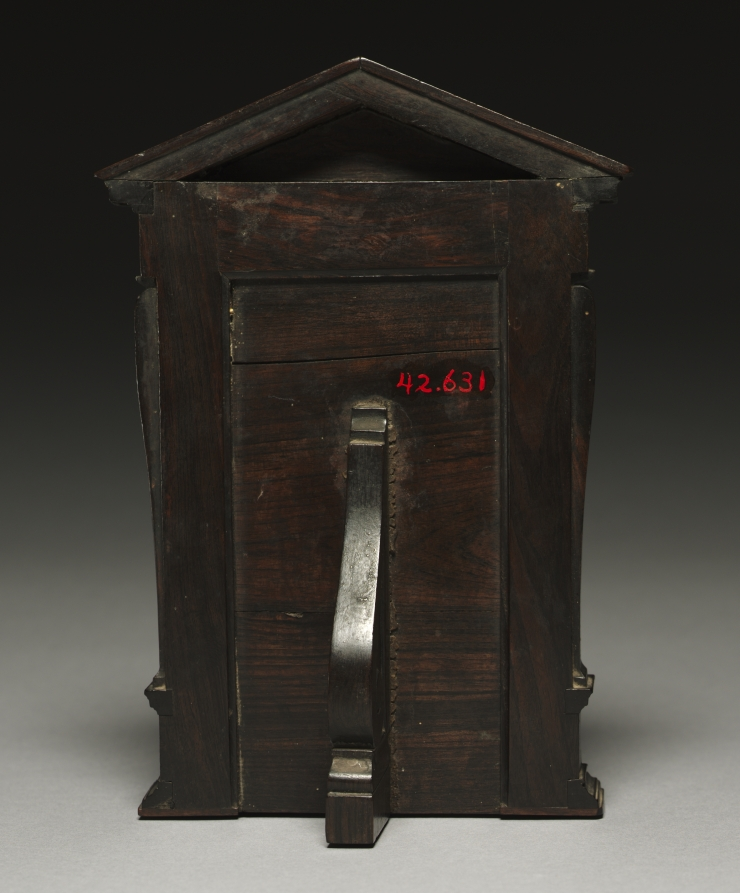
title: Pax with Christ Appearing to the Apostles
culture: Germany, late 16th century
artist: cast after a model by Valerio Belli (Italian, c. 1468–1546)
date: late 1500s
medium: gilt bronze in ebony frame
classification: Sculpture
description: A pax is a tablet depicting a sacred subject that a priest held out to be kissed during the Mass. The scene on this tablet is of Christ preaching to ten apostles. The image is by an unknown artist who based it on a plaquette by the gem engraver and medalist Valerio Belli (1468–1546) and demonstrates an awareness of linear perspective and scale conventions common in Renaissance Italy. The triumphal arch seen behind the figures, for example, contains coffering and Corinthian capitals that have been present in Italian art since the early 1400s. The arch itself is supported by columns in order to reveal the landscape behind it. The foliage seen at the top of the arch and at the figures' feet, however, is not present in the Belli and suggests the stylistic influence of northern Europe. The plaquette's gilding may have been intended to create painterly effects on a low-relief metal surface. The work is encased inside an ebony frame. The wood used for the frame—and the three putti heads it contains—suggests origins in southern Germany, possibly Nuremberg or Augsburg. The frame is also decorated with vine and floral patterns, which could originate in either medieval tapestries or northern European manuscripts.